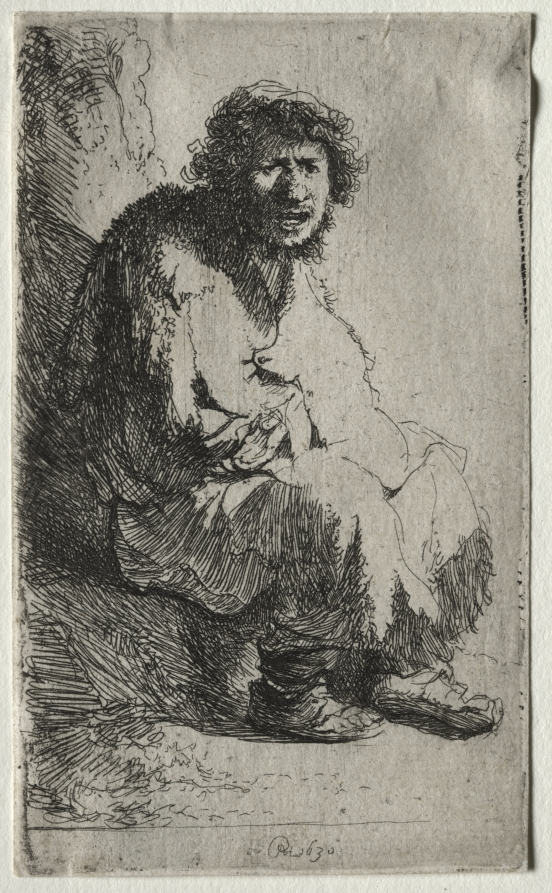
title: Beggar Seated on a Bank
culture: Netherlands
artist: Rembrandt van Rijn (Dutch, 1606–1669)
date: 1630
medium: etching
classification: Print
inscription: upper right, in graphite: 17[4 4?] ; lower center, in plate: RHL[in monogram] 1630 ; VERSO, center, in graphite: B. 174 ; center right, in pen and brown ink: E[sideways] # / 4.10 ; across surface, various inscriptions: illegible [faded, erased]